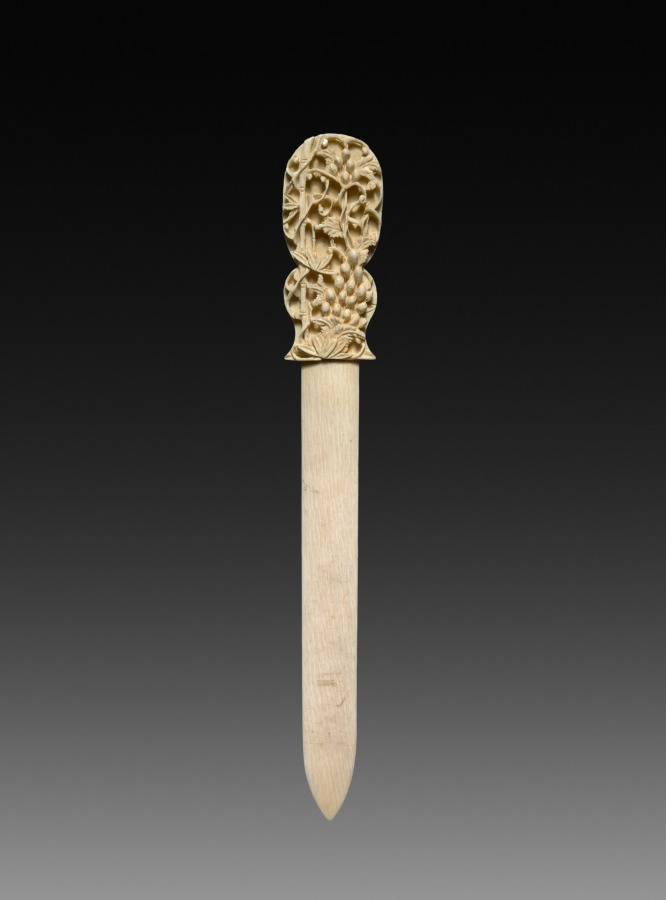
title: Paper Knife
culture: Japan, Meiji period (1868–1912)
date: early 1900s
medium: Carved ivory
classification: Ivory